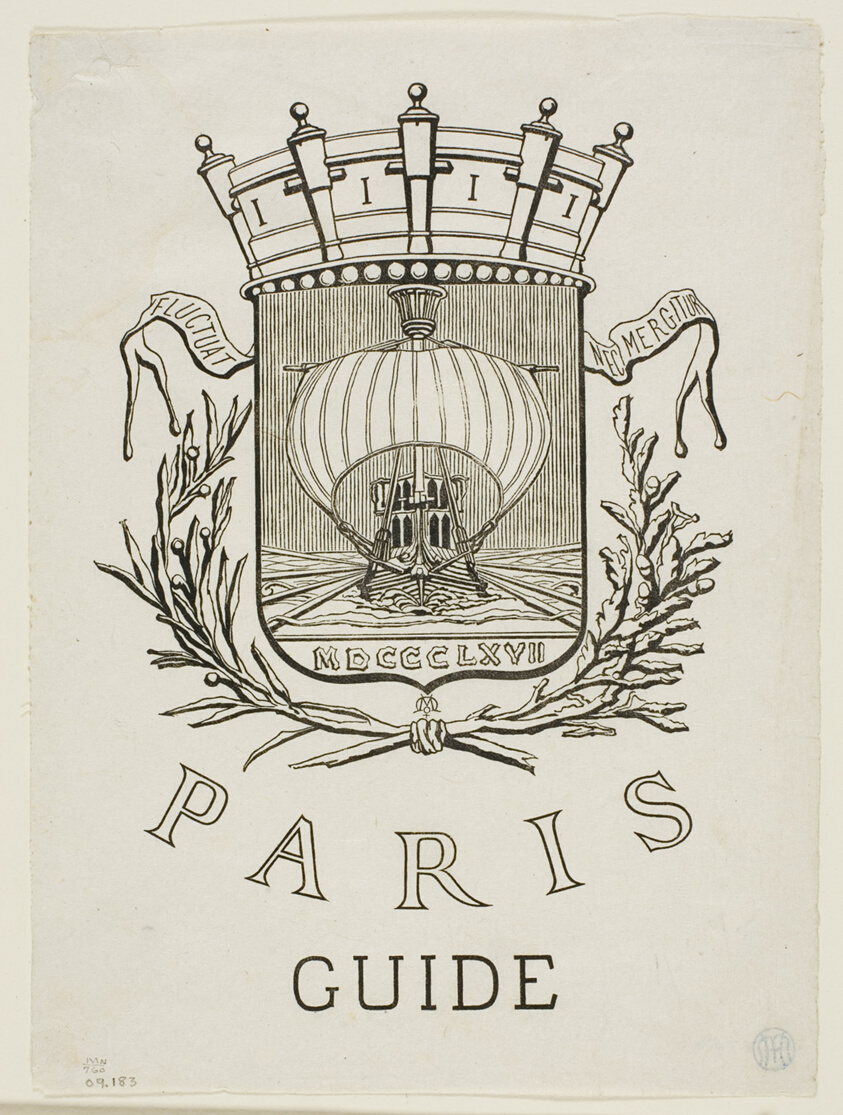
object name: Print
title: It Rocks but is Not Sunk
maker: after Charles Meryon; French, 1821-1868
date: 1854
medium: Woodcut in black on ivory laid paper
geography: France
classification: woodcut; print; prints and drawing